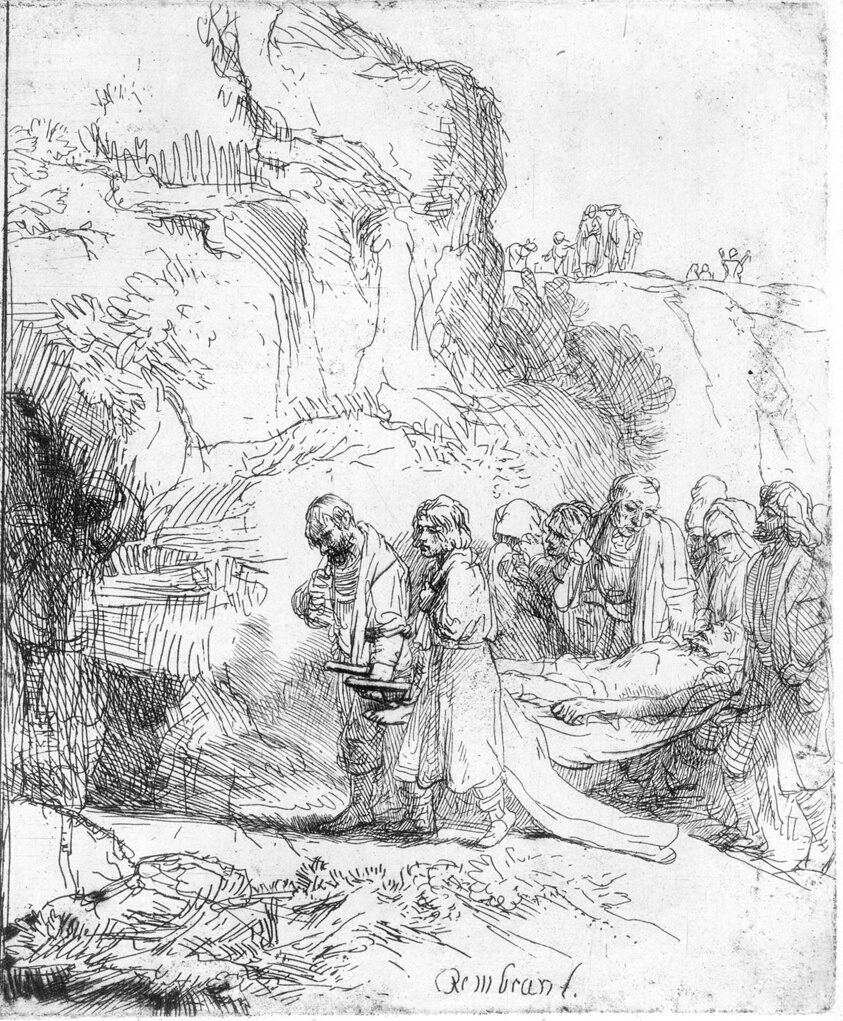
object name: Print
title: Christ Carried to the Tomb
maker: Rembrandt van Rijn (Dutch, 1606-1669)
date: c. 1645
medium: Etching and drypoint on white laid paper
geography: Holland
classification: etching; print; prints and drawing; paper; drypoint